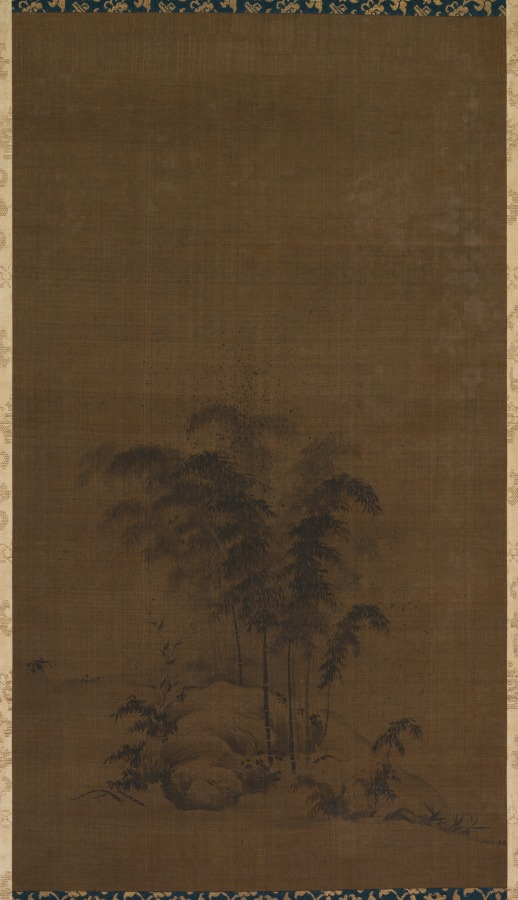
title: Bamboo Landscape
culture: China, Southern Song dynasty (1127–1279)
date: 1127–1279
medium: hanging scroll; ink on silk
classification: Painting